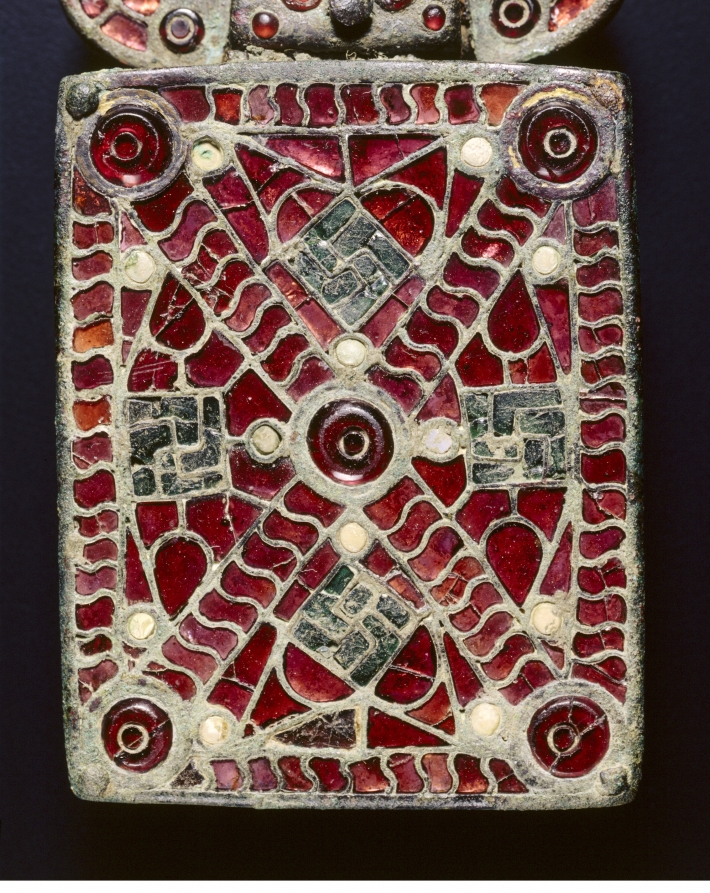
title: Belt Buckle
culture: Visigothic, Spain, Migration Period, 6th century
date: c. 525–560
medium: bronze with garnets, glass, mother of pearl, gold foil, traces of gilding; bronze and glass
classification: Jewelry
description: The art of the European Migration Period (3rd-7th centuries AD) is almost exclusively one of personal adornment-a portable art that followed men and women to their graves. Belt buckles with large rectangular attachment plates have been discovered in cemeteries across the Iberian Peninsula-now occupied by Spain and Portugal-from the period of Visigothic occupation (about AD 412-711). Their decoration varies. Finer examples, like this one, are distinguished by brilliantly inlaid semi-precious stones and colored glass. Garnets were especially prized in Visigothic society for use in cloisonné jewelry. The technique involved the fitting of carefully cut pieces of polished garnet into an intricate grid of compartments, or cloisons. This buckle is so densely inlaid with garnets that it presents a virtual "carpet" of red to the eye. These large Visigothic buckles are strikingly uniform in shape yet endlessly varied in surface design, perhaps a sign that they expressed the personal identities of their original owners. Grave excavations have shown that belt buckles of this type were made for women.